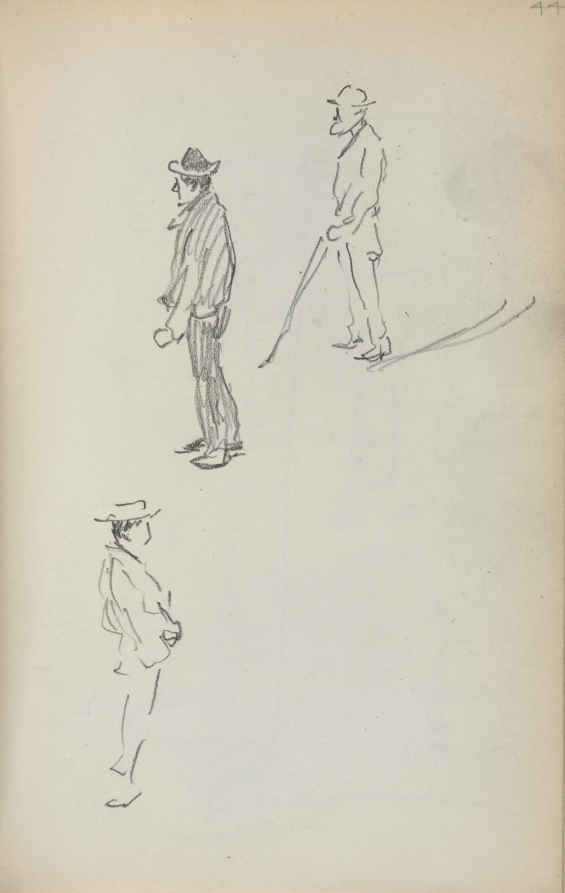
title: Italian Sketchbook: Three Standing Men (page 44)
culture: America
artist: Maurice Prendergast (American, born Newfoundland [now Canada], 1858–1924)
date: 1898–1899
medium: pencil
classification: Bound Volume